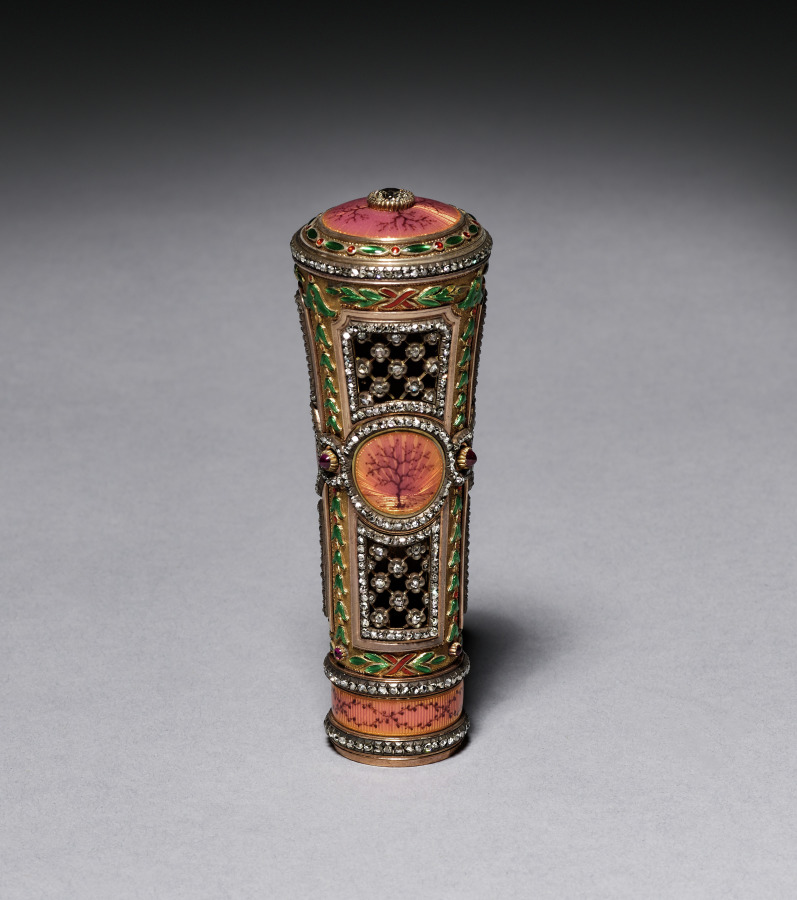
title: Parasol Handle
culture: Russia, St. Petersburg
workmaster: Michael Evlampievich Perchin (Russian, 1860–1903)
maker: House of Fabergé (Russian, 1842–1918)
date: c. 1886–1903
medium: Gold, enamel, diamonds, and platinum filigree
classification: Metalwork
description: Women devised many methods to protect themselves from the sun when strolling outside at the end of the nineteenth century. One constant barrier from the harsh rays was the daytime parasol which looked like an umbrella but was used strictly for shade. The House of Fabergé specialized in providing fashionable wealthy ladies with bejeweled handles such as this example, which could be screwed directly into the end of the parasol shaft when a more formal look was desired.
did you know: A wealthy lady around 1900 could unscrew her jeweled parasol handle and take it with her for safekeeping or swap it for another color.